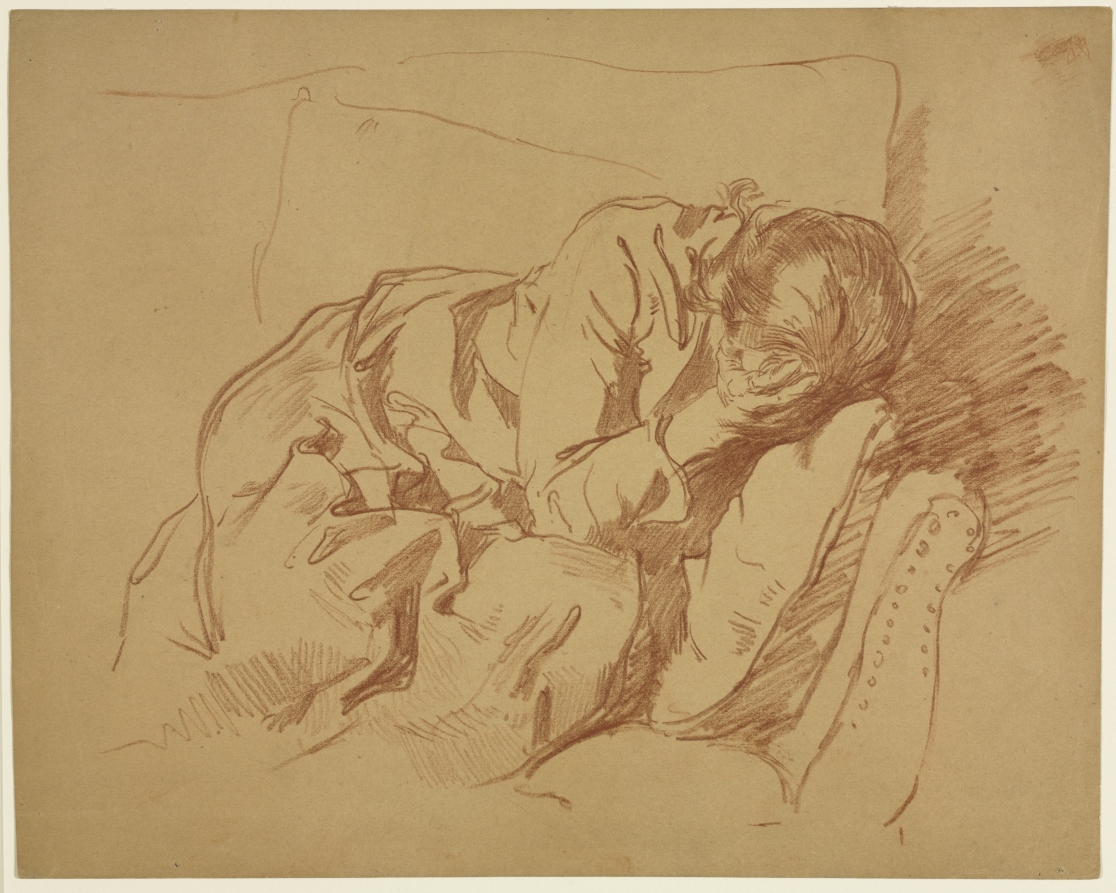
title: Lamenting Woman (Sarah H. Crone)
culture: America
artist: Samuel H. Crone (American, 1858–1913)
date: 1880s or 1890s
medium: red chalk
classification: Drawing